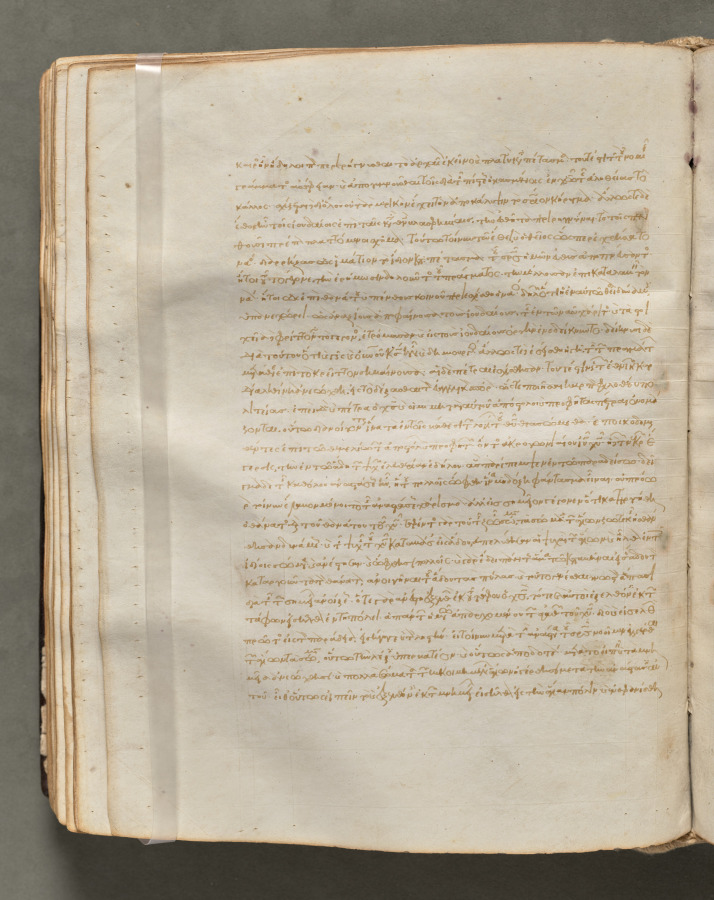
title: Text, folio 127 (verso), from a Gospel Book with Commentaries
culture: Byzantium, Constantinople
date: c. 1000–1100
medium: ink, tempera, and gold on vellum; leather binding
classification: Bound Volume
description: Each of the four gospels in this book opens on a page with brilliantly illuminated borders depicting the author of the text as well as birds-principally peacocks, symbols of the immortality of the soul-and fountains, representing the fountain of life and the salvation of the soul. This volume consists of 428 leaves with texts in Greek. Its level of sophistication suggests that it was probably written and decorated in a monastery in Constantinople.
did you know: Gospel Books were carried in procession through Byzantine churches.